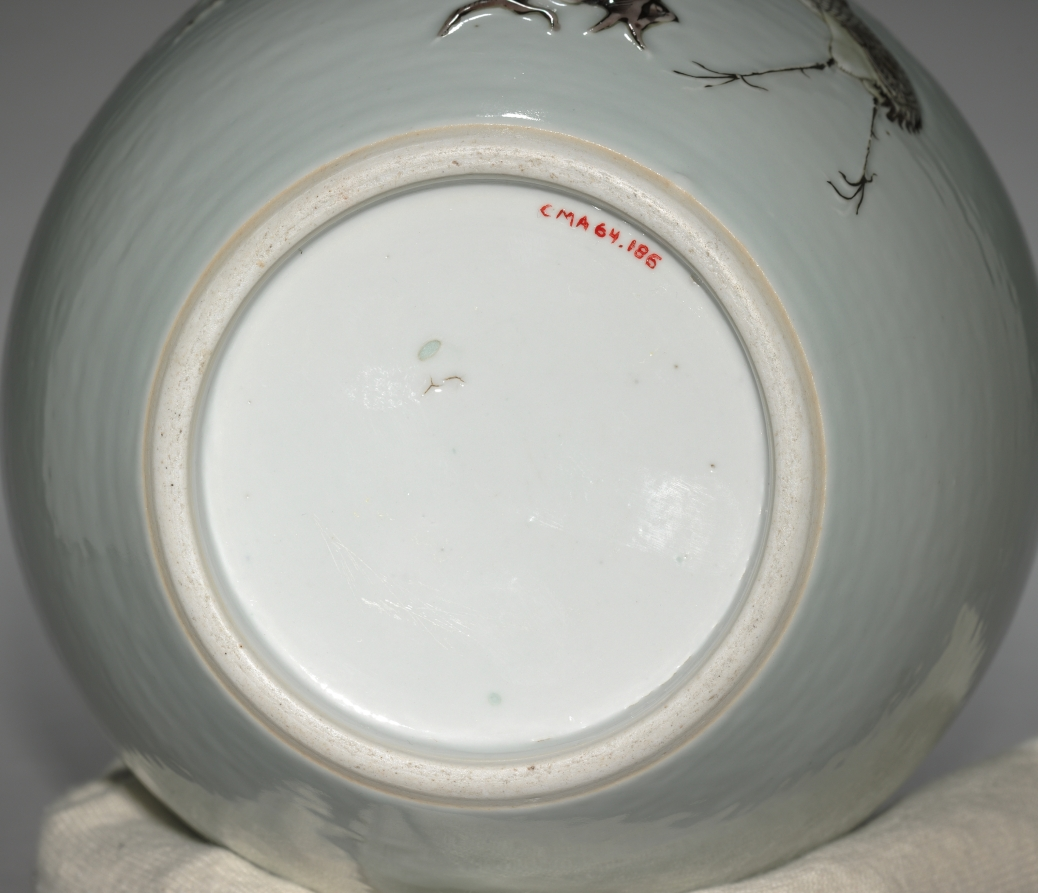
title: Jar with Crane and Willow in Relief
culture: China, Jiangxi Province, Jingdezhen kilns, Qing dynasty (1644–1911)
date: 1700s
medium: porcelain with raised and overglaze enamel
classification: Ceramic